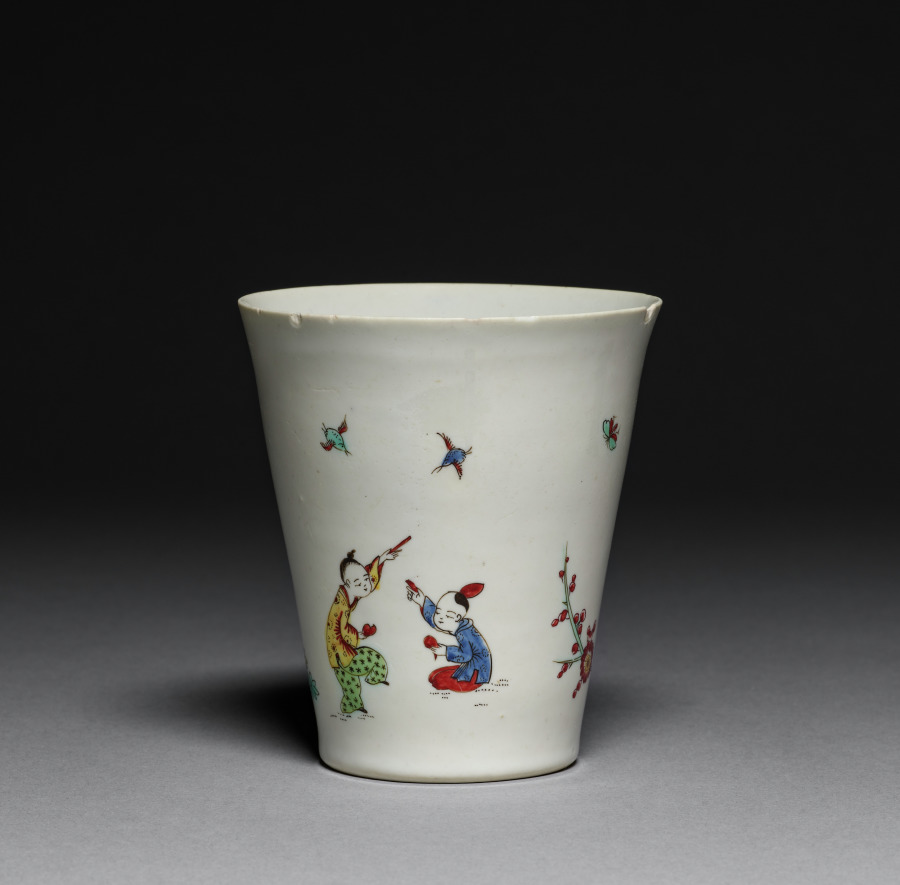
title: Beaker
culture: France, Mennecy, 18th century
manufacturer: Mennecy- Villeroy Factory (French)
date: 1725–1750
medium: soft-paste porcelain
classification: Ceramic